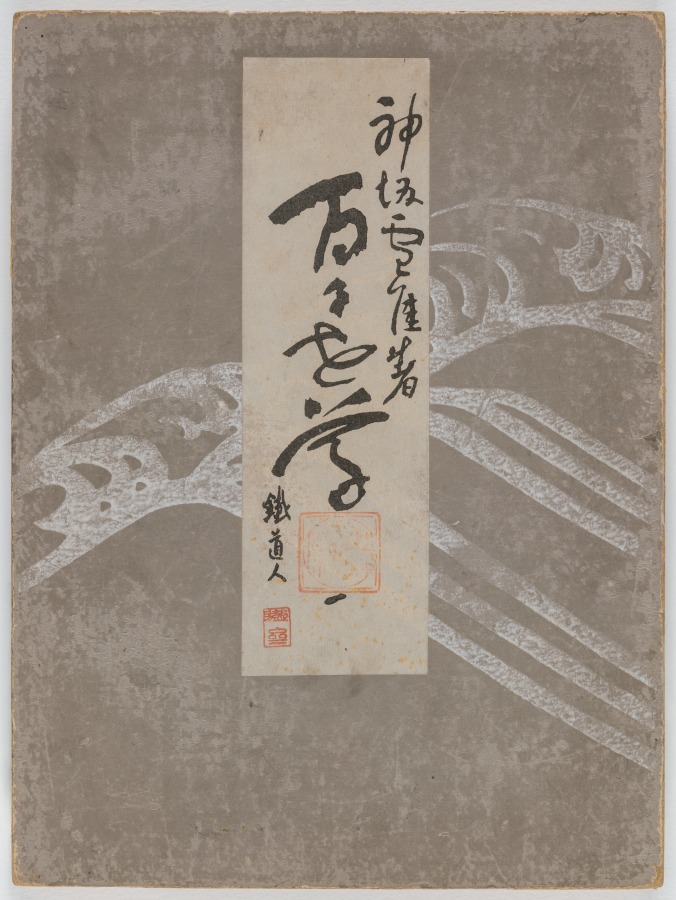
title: Flowers of a Hundred Worlds (Momoyogusa), Vol. 1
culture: Japan, Meiji period (1868–1912)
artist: Kamisaka Sekka (Japanese, 1866–1942)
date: 1909–10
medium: one of a set of three woodblock-printed folding-books; ink, color, gold, and silver on paper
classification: Bound Volume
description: This is the first of a set of three woodblock printed albums by Kamisaka Sekka, the artist considered the last major exponent of the Rinpa style of painting and design associated with the artists Tawaraya Sōtatsu (died about 1640) and Ogata Kōrin (1658-1716). Momoyogusa, in addition to meaning "flowers of a hundred worlds," is a classical name for the chrysanthemum. It appears in a poem by Mimube no Tarukuni (dates unknown) written in 755 and contained in the first Japanese imperial poetry anthology, Collection of Ten Thousand Leaves (Man'yōshū). In the poem, Tarukuni, who was posted in northern Kyushu as a guard at the time, asked a missed beloved in his home province to be well for a hundred nights, like the chrysanthemums growing in his parents' garden. Chrysanthemums are traditionally associated with longevity, and in some cases immortality. This volume of Sekka's series includes a preface poem by the Kyoto-based physician and poet Sugawa Nobuyuki (1839-1917) that may be glossed as follows: As we move forward in the spirit of the new age, "flowers of a hundred worlds" sown by seed, now blossom in distinctive colors and scents (translation by John T. Carpenter)